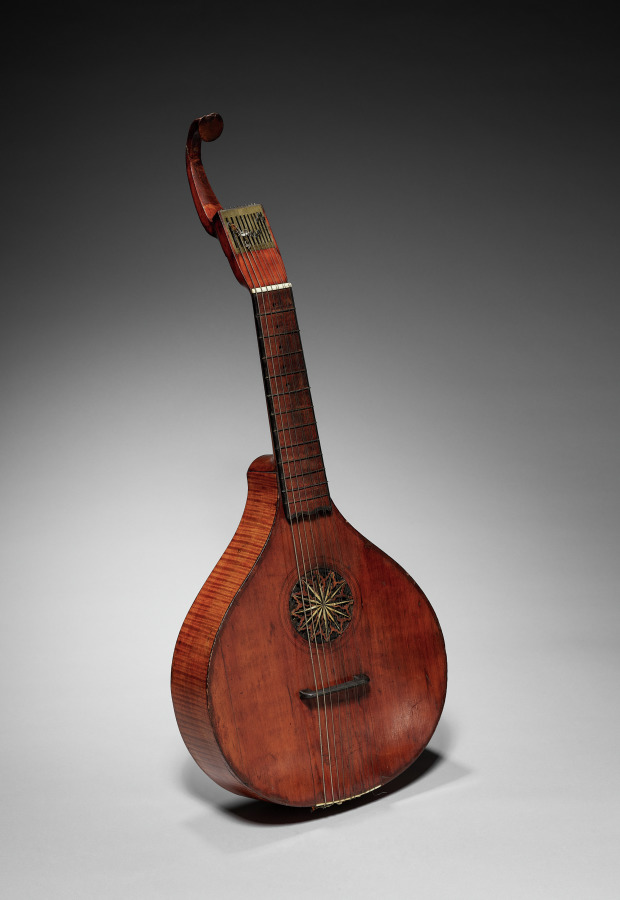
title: Guitar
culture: England, London, late 18th century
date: late 1700s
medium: varnished wood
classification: Musical Instrument